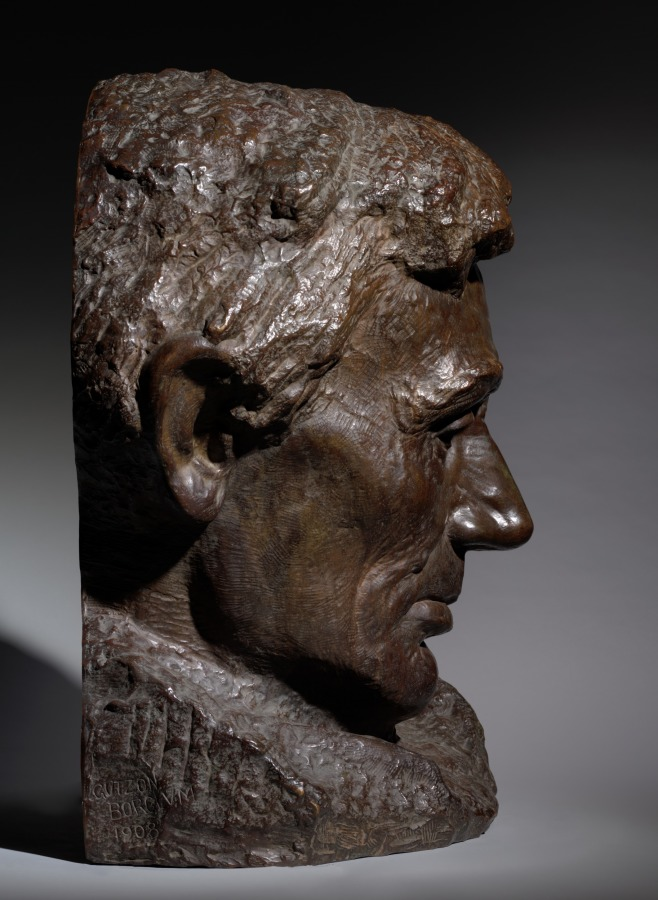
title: Head of Lincoln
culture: America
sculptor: Gutzon Borglum (American, 1867–1941)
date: 1908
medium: bronze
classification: Sculpture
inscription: Signed and dated on left of base: "Gutzon Borglum, 1908"